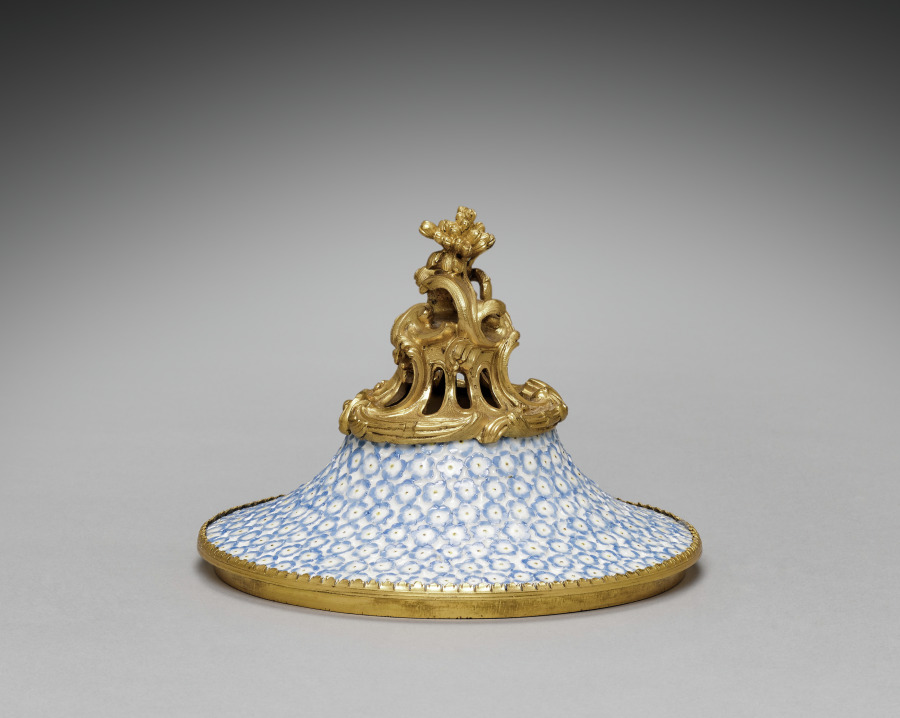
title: Cover for a Vase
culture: Germany, Meissen, 18th century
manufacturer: Meissen Porcelain Factory (German, est. c. 1710)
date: 1749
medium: porcelain mounted in gilt bronze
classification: Ceramic